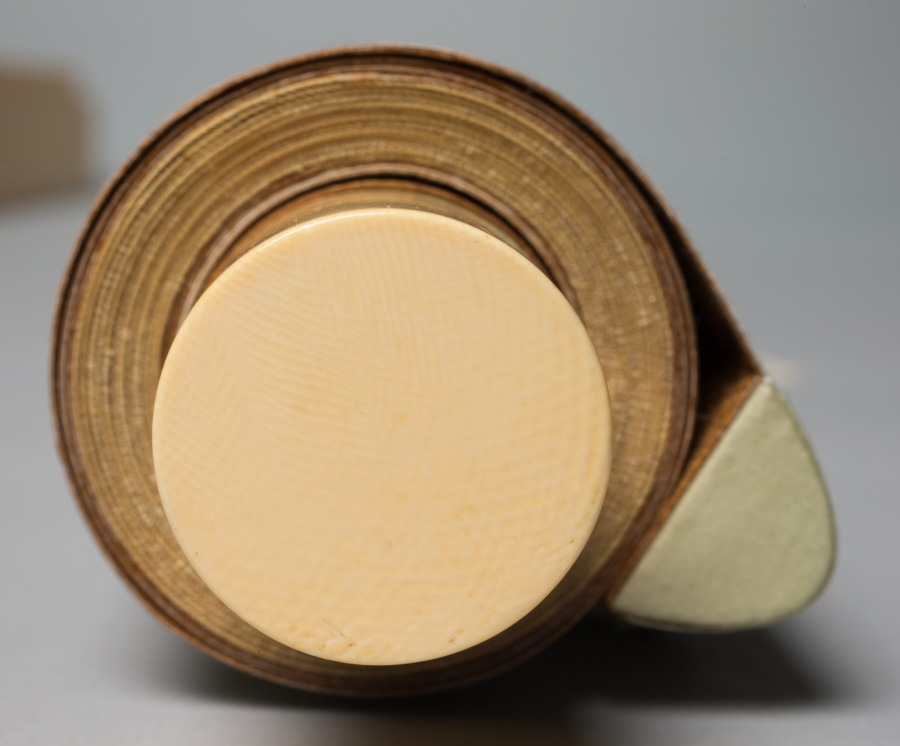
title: Prunus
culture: Japan, Edo period (1615–1868)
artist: attributed to Kano Einō (Japanese, 1631–1697)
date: mid- to late 1600s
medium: hanging scroll; ink on paper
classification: Painting